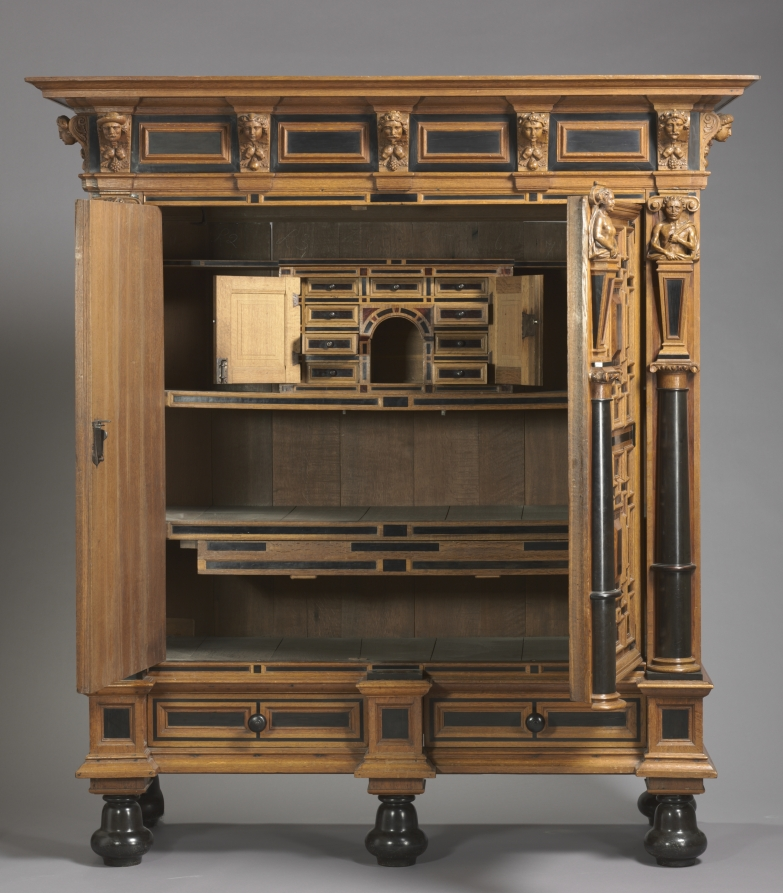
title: Wardrobe (Kast)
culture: Netherlands, Holland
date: c. 1625–50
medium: oak with ebony and rosewood veneers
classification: Furniture and woodwork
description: After the founding of the Dutch East India Company in 1602, the use of exotic, imported wood veneers in furniture became more prevalent. So too did the use of perspective and mathematical systems in laying out the veneers. The combination produced a style of decoration that spread across Europe and even to the young colonies in America.